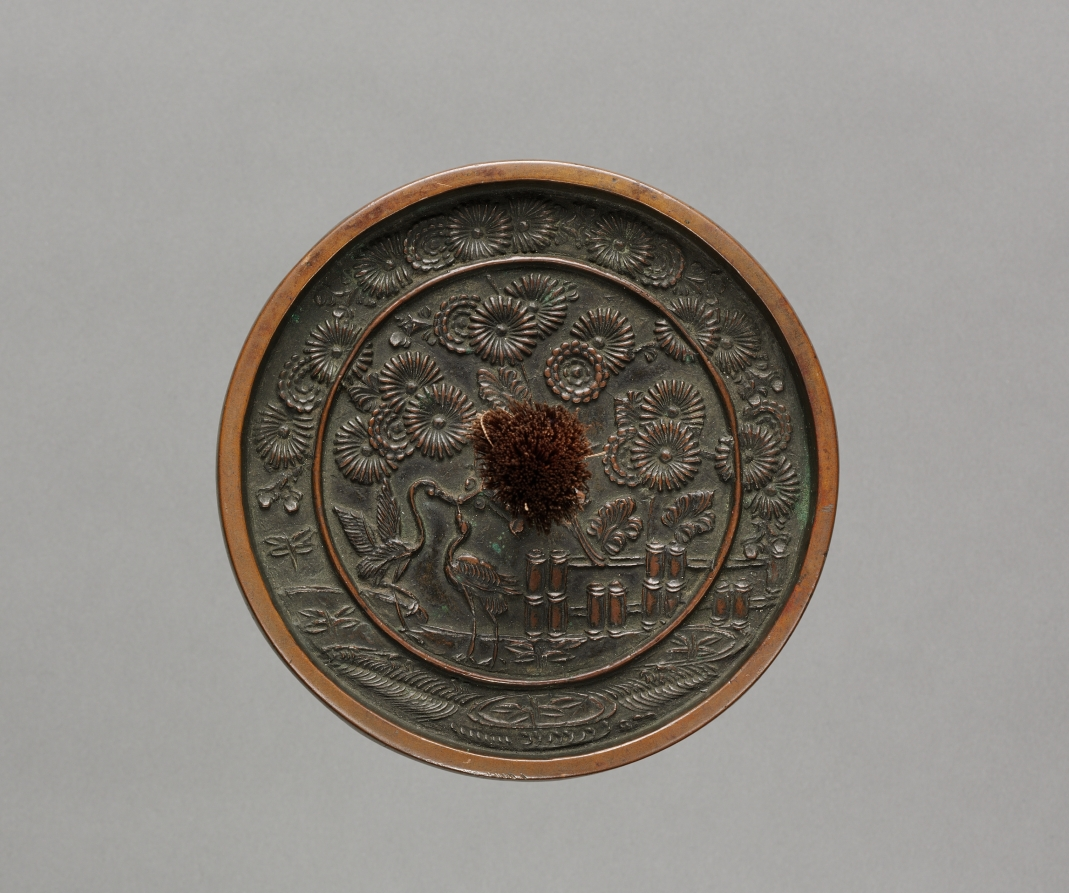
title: Mirror with Pair of Cranes in Chrysanthemum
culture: Japan, Muromachi period (1392–1573)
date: 1400–1573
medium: bronze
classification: Metalwork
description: The Japanese used chrysanthemums as decorative elements on mirrors. In the Heian period, a chrysanthemum with cranes or long-tailed birds was a common motif. Later, in the Kamakura and Muromachi periods, chrysanthemum designs were divided into three patterns with different symbolic associations: Chrysanthemum with Cranes represented longevity; Water Flowing suggested longevity as well as the Noh drama Kikujido, or Chrysanthemum Boy; and East Fence alluded to the poem "Drinking Wine" by Tao Yuanming (AD 365-427). Here, the mirror featuring Buddhist iconography (kyojo) and a chrysanthemum design on the back shows that the flower was also appreciated in the context of Buddhism in the Kamakura period.